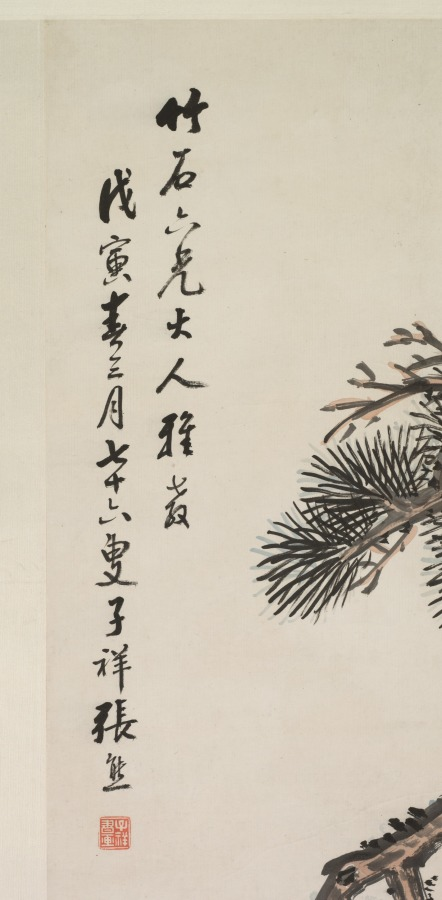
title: Three Purities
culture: China, Xiaxing, Qing dynasty (1644-1911)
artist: Zhang Xiong (Chinese, 1803–1886)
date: 1800s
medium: hanging scroll, ink and color on paper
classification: Painting